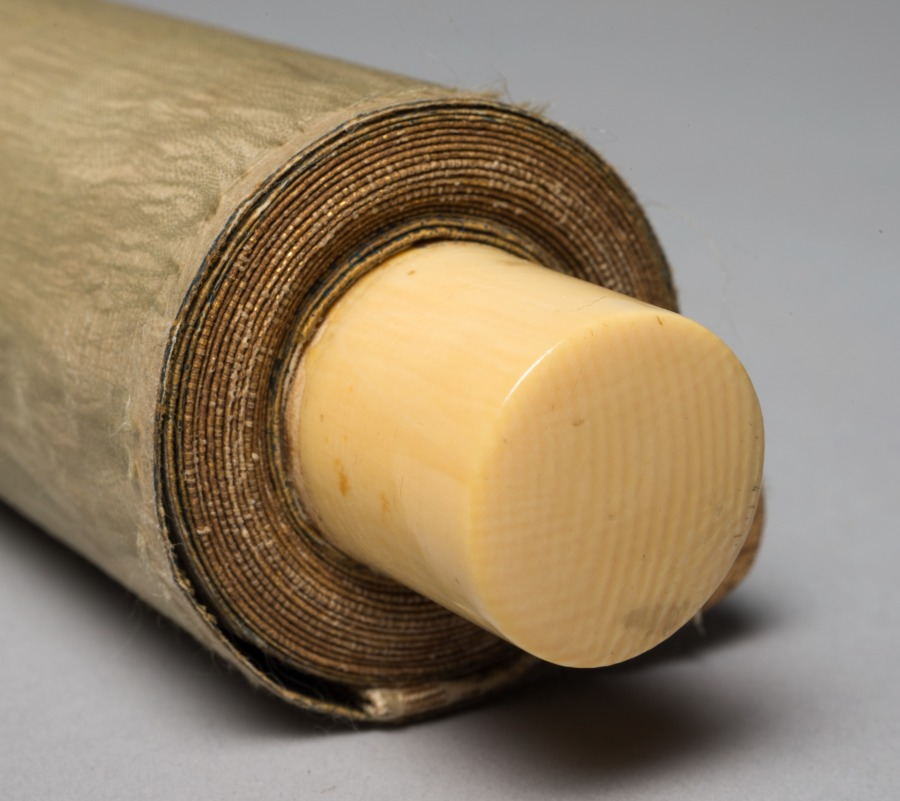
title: Chinese Bird on Snow-Laden Branch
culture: Japan, Edo period (1615–1868)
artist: Kano Tan’yū (Japanese, 1602–1674)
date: 1661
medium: One of a triptych of hanging scrolls; ink and slight color on silk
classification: Painting